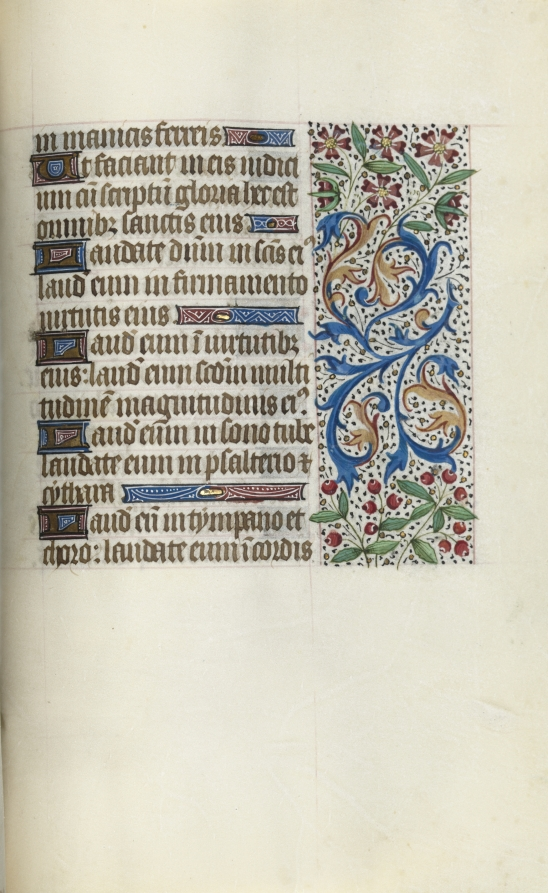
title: Book of Hours (Use of Rouen): fol. 143r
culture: France, Rouen, 15th century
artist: Master of the Geneva Latini (French, active Rouen, 1460–80)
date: c. 1470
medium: ink, tempera, and gold on vellum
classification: Bound Volume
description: In the late 1400s and early 1500s Rouen was an established and important center of book production. The city’s cathedral had a wealthy chapter that spent large sums of money to commission books and to maintain its extensive library. The stationers and booksellers would have likely been concentrated in or near the cathedral precinct. This artist, named after a manuscript now in Geneva, was Rouen’s principal illuminator during the second half of the 1400s.